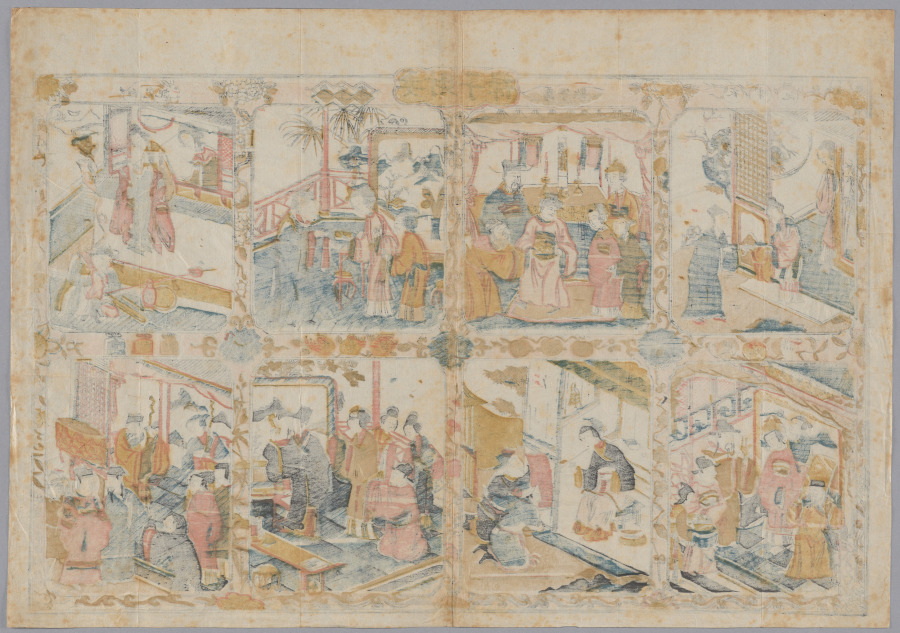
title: Wife, Wealth, Sons, and a Salary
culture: China, Qing dynasty (1644–1911), Kangxi reign (1622–1722)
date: 1662–1722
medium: Polychrome woodblock print; ink and color on paper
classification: Print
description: In the 1600s, printing flourished in such Jiangnan cities as Nanjing, Suzhou, Hangzhou, and Huizhou, evolving from privately enjoyed illustrated books printed in color to more commercialized single-sheet color prints that were hung on walls and became part of the rich urban visual culture.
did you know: Woodblock printing in color reached a height in China in the 1600s to 1700s. The prints were executed by means of sets of separate blocks, each carved to print a different color.